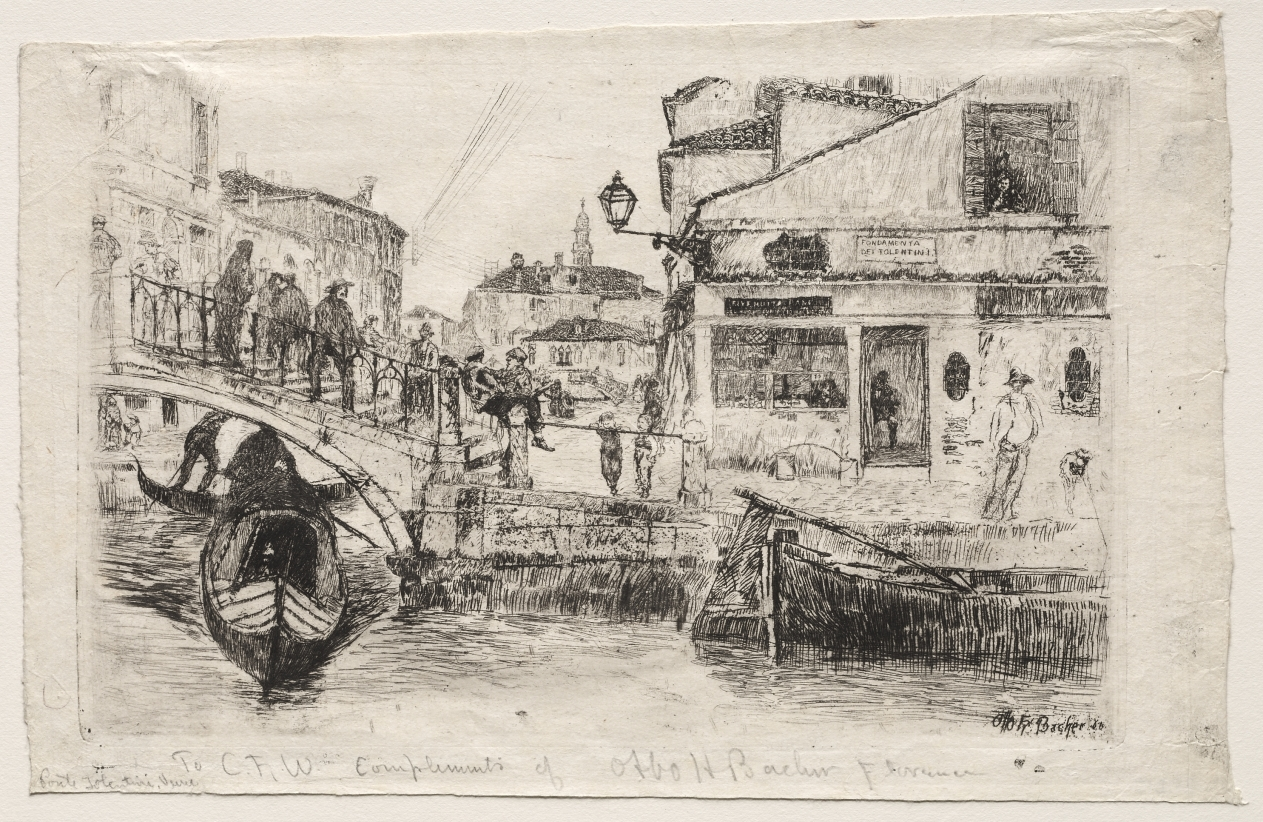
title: Ponte Tolentine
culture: America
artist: Otto H. Bacher (American, 1856–1909)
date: 1880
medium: etching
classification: Print